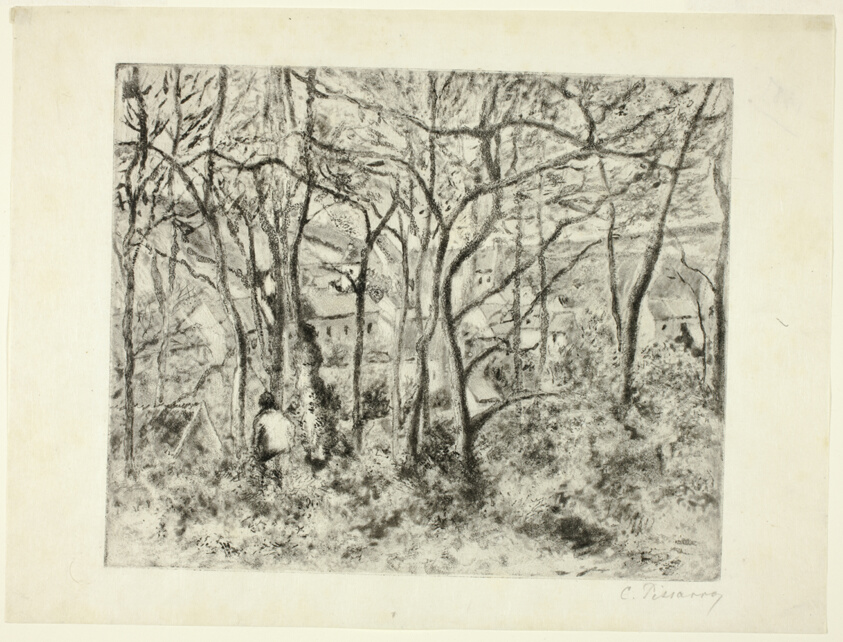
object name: Print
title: Woodlands at the Hermitage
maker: Camille Pissarro (French, 1830-1903)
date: 1879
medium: Aquatint, soft ground etching, and drypoint in black on ivory Japanese paper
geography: France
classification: aquatint; print; prints and drawing